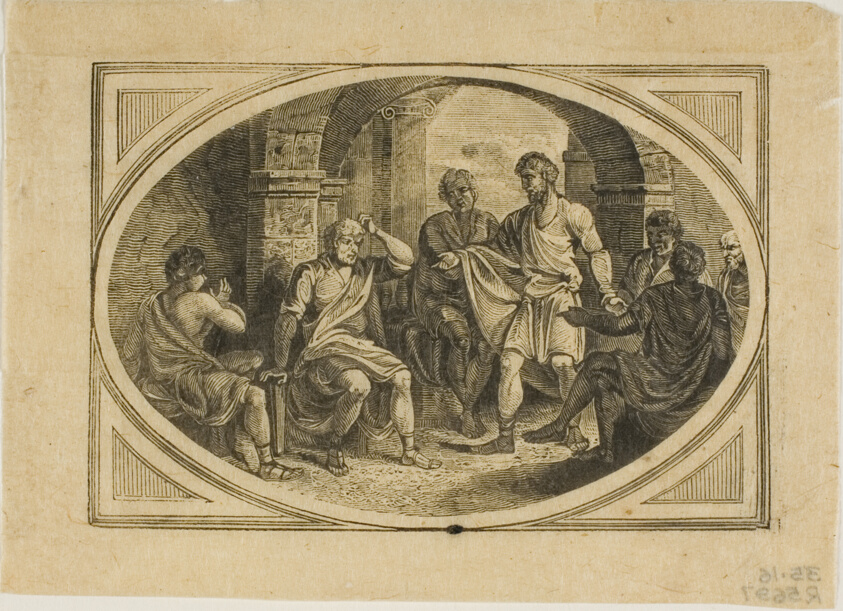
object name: Print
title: Fable: The Boasting Traveler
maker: Thomas Bewick (English, 1753-1828)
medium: Woodcut on paper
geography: England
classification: wood engraving; print; prints and drawing